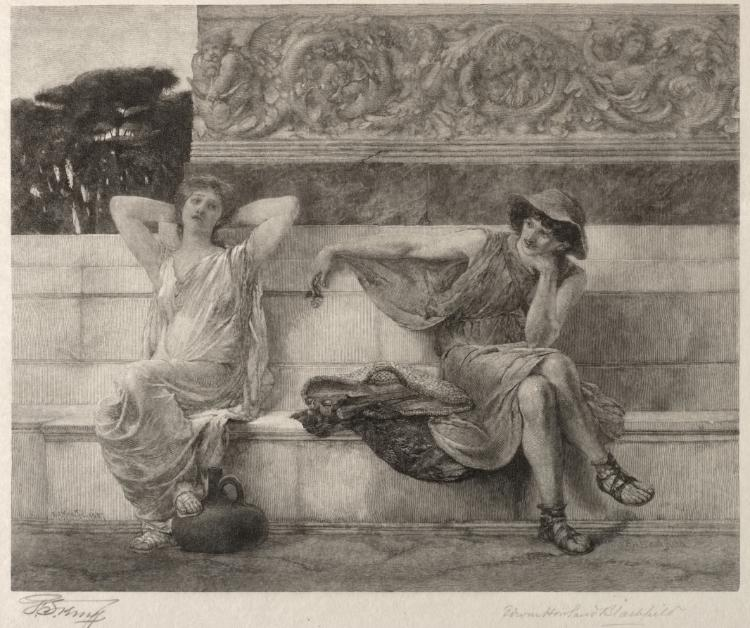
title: A Difference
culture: America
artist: Francis Scott King (American, 1850–1913)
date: 1887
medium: wood engraving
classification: Print